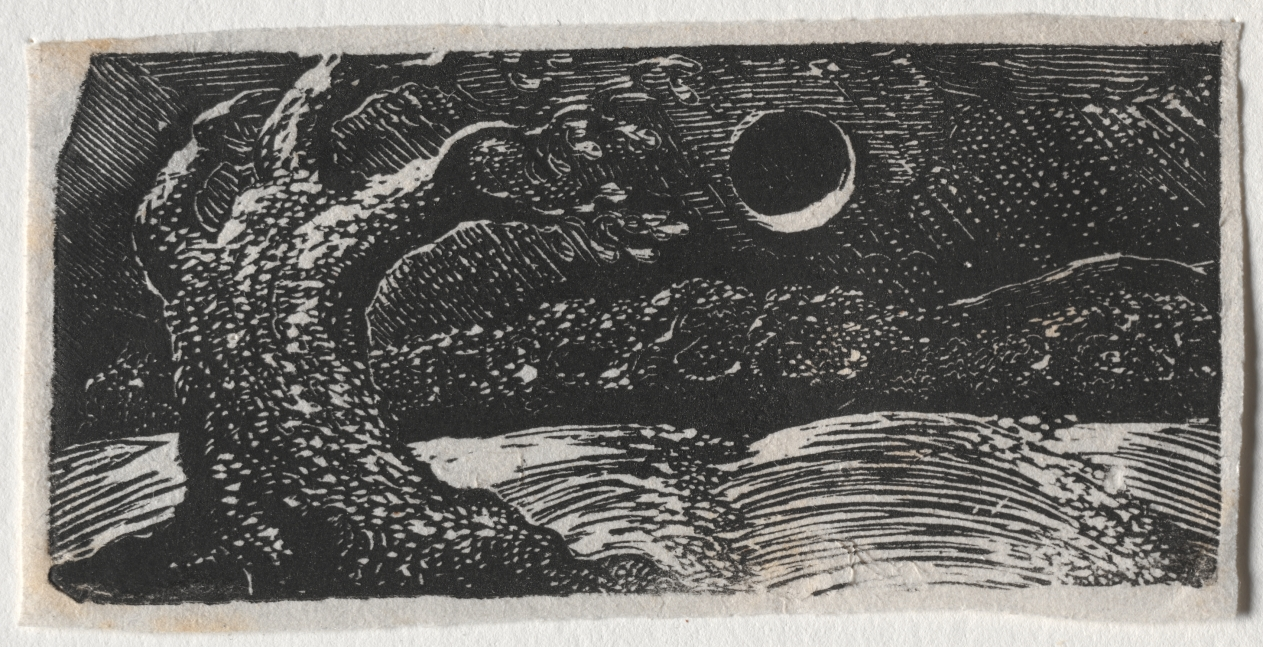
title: The Pastorals of Virgil, Eclogue I: The Blasted Tree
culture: England, 19th century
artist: William Blake (British, 1757–1827)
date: 1821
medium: wood engraving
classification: Print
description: William Blake conceived and engraved 17 designs for Dr. Robert John Thornton’s The Pastorals of Virgil, a popular schoolbook used in teaching Latin. The publication included translations of poems by ancient Roman author Virgil that focus on a rural setting as both a subject matter and as the background for discussions of various issues, from love to politics. Blake’s illustrations reveal his emphasis on the natural world. As his only wood engravings, they also show how the process entails cutting away from the woodblock to create lighter sections, in essence working in white over a black background. Here, several areas—such as the textures of the trees—emphasize that point.